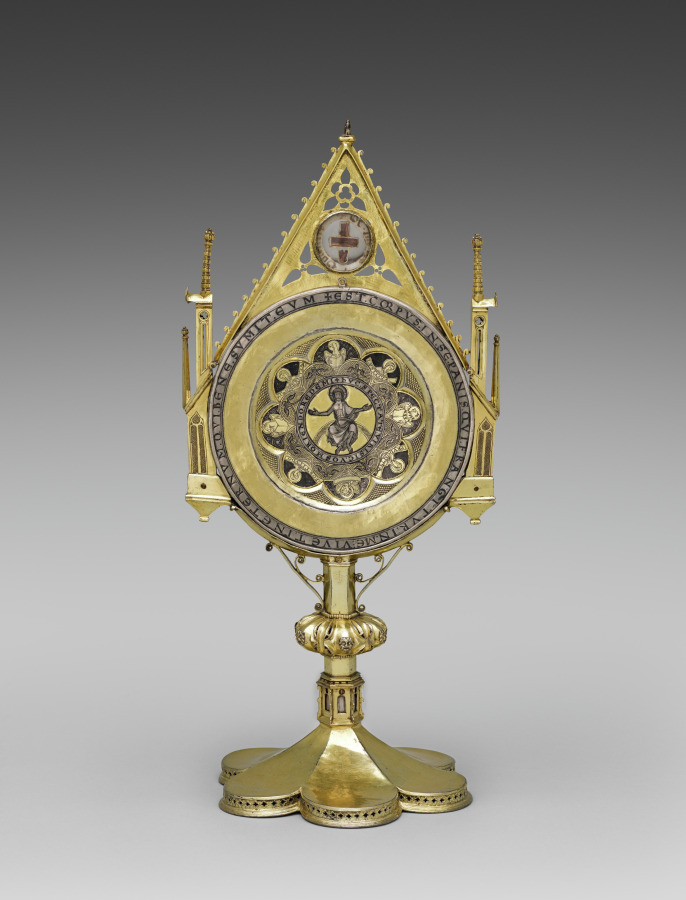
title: Monstrance with the "Paten of Saint Bernward"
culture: paten: Germany, Lower Saxony, Hildesheim; monstrance: Germany, Lower Saxony, Brunswick, Gothic period, paten: 12th century; monstrance: 14th century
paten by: Saint Oswald Reliquary Workshop (German)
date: c. 1180–1190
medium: silver, gilded silver, niello, rock crystal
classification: Metalwork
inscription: located in monstrance: two slivers of the True Cross surrounded by parchment with the inscription: DE SIGILLO DOMINI. Paten inscribed: +EST.CORPVS.IN.SE.PANIS.QVI.FRANGITVR.IN.ME:VIVET.IN ETERNVM. QVI.BENE.SVMIT.EVM. (outer rim); +HVC.SPECTATE. VIRI.SIC.VOS MORIENDO.REDEMI.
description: Designed to facilitate the display and veneration of ten relics, this sumptuous ostensorium (from the Latin ostendere, meaning "to show") is one of the most unusual reliquaries in the Guelph Treasure. Elements of contemporary Gothic architecture in miniature frame an elaborately decorated liturgical paten, the shallow disc or plate used for the elevation of the Eucharist during Mass. Fragments of the True Cross are enclosed behind a rock crystal in the gable, while other saintly relics, each wrapped in silk and identified by inscriptions, are visible only from the back. The paten is inscribed on its outer rim with the words "The bread which is broken in me is the body itself. He who receives it in good faith shall live in eternity." Another inscription surrounding the image of the enthroned Christ at the paten's center, reads, "Behold, o men, I have thus redeemed you with my death." Symbols of the four Evangelists and personifications of the four cardinal virtues complete the paten's iconographic program.